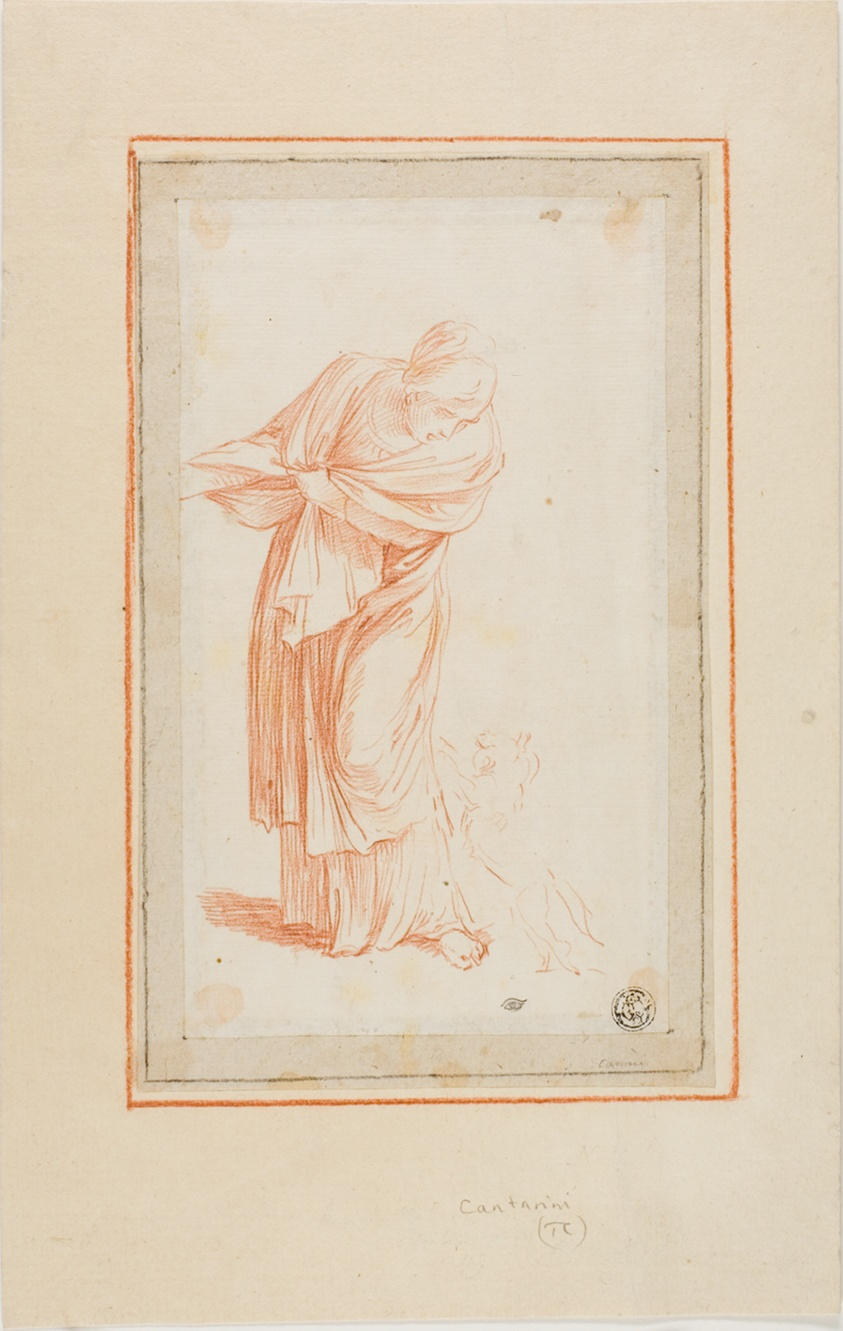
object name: Drawing and Watercolor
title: Woman and Dog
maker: Giovanni Angelo Canini; Italian, 1609-1666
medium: Red chalk on ivory laid paper, tipped onto cream laid paper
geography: Italy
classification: chalk; drawings (visual works); prints and drawing